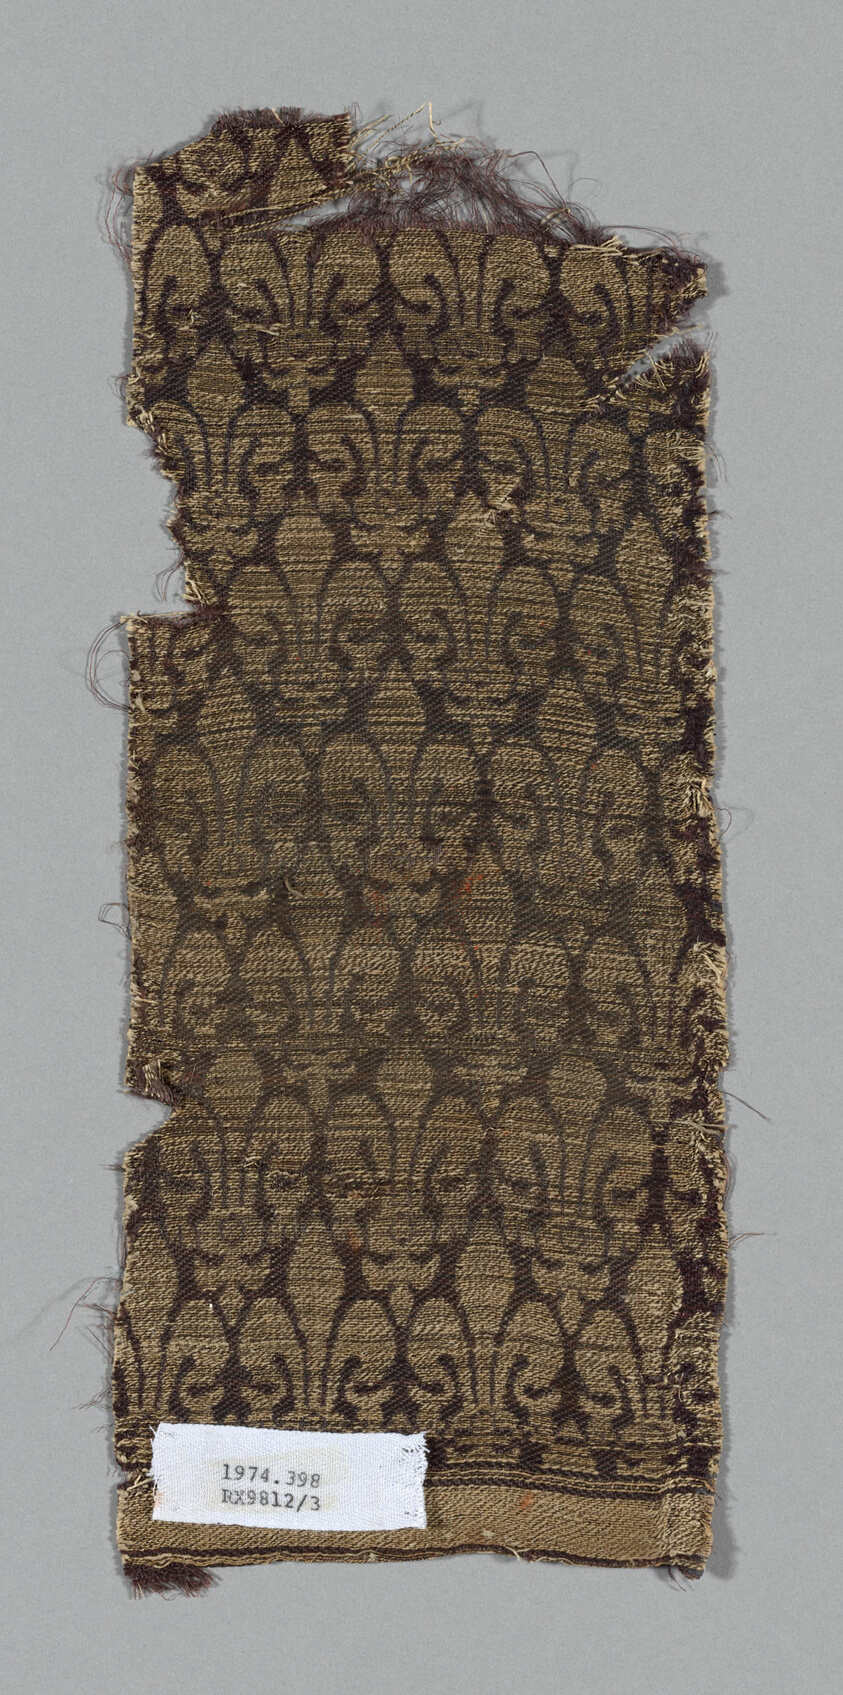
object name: Textile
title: Fragment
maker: Italy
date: 13th century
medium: Silk, twill weave, brocaded with metal thread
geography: Italy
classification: textile; weaving